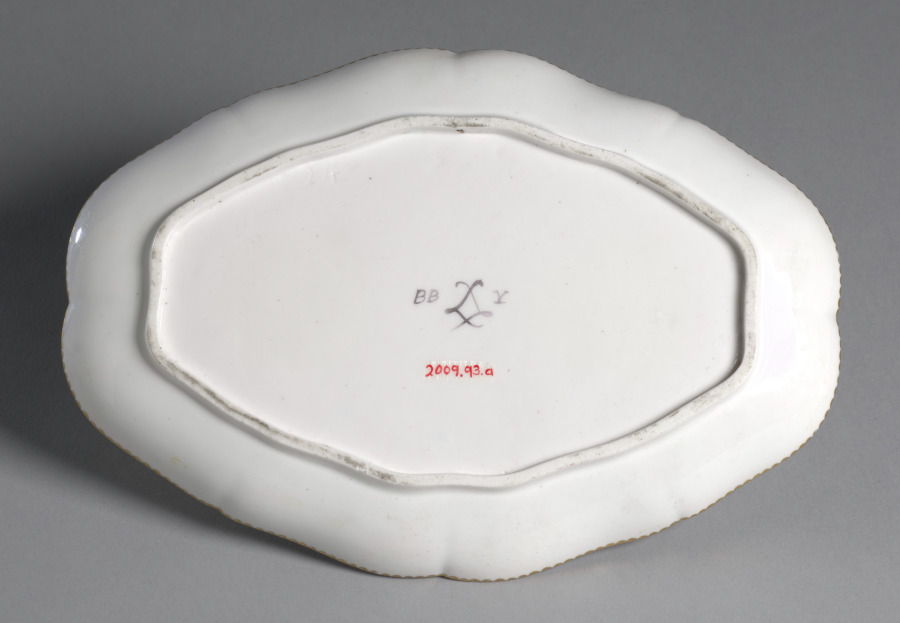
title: Jam Pots on Stand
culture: France, 18th century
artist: Sèvres Porcelain Factory (French, est. 1756)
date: c. 1760's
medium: porcelain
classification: Ceramic